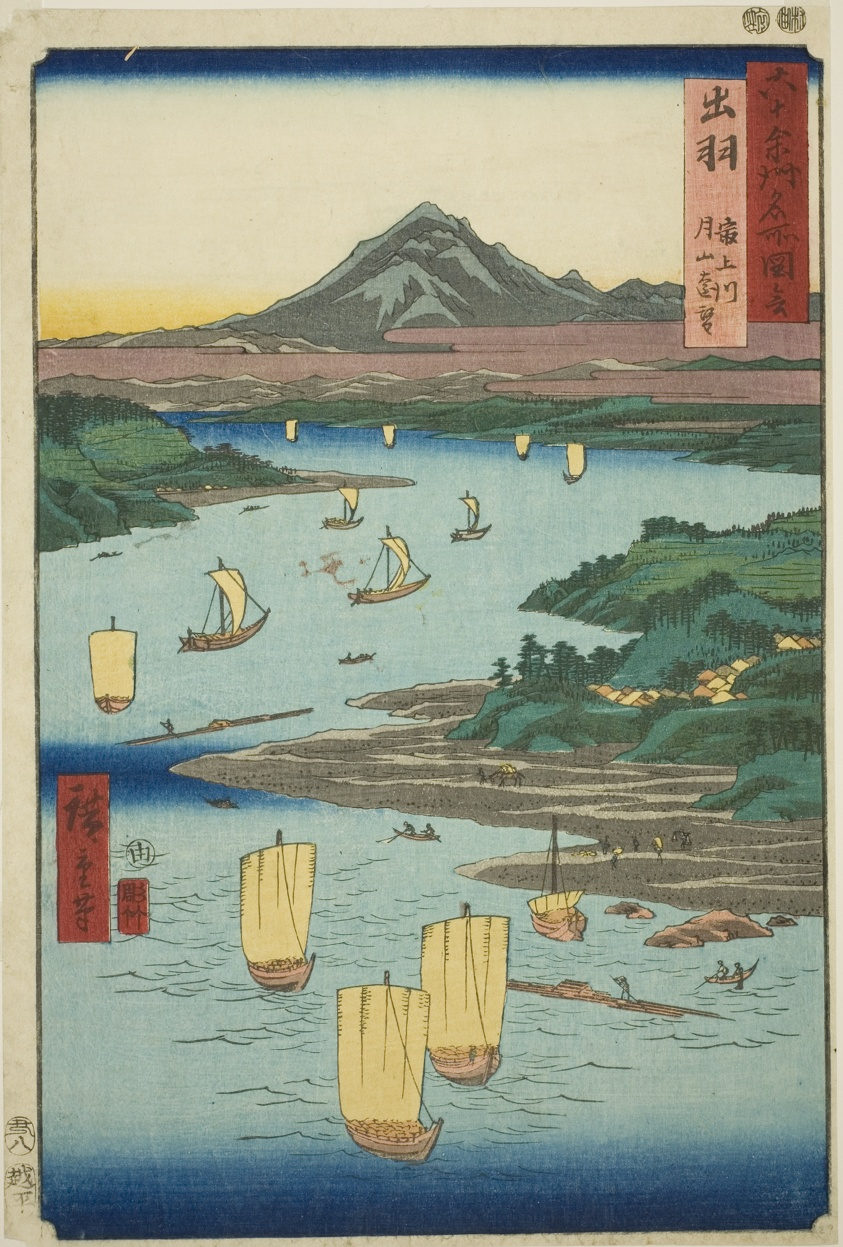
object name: Print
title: Dewa Province: Mogami River and a Distant View of Mount Gassan (Dewa, Mogamigawa, Gassan enbo), from the series "Famous Places in the Sixty-odd Provinces (Rokujuyoshu meisho zue)"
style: Japanese (culture or style)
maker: Utagawa Hiroshige 歌川 広重; Japanese, 1797-1858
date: 1853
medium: Color woodblock print; oban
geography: Japan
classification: woodblock print; print; asian art